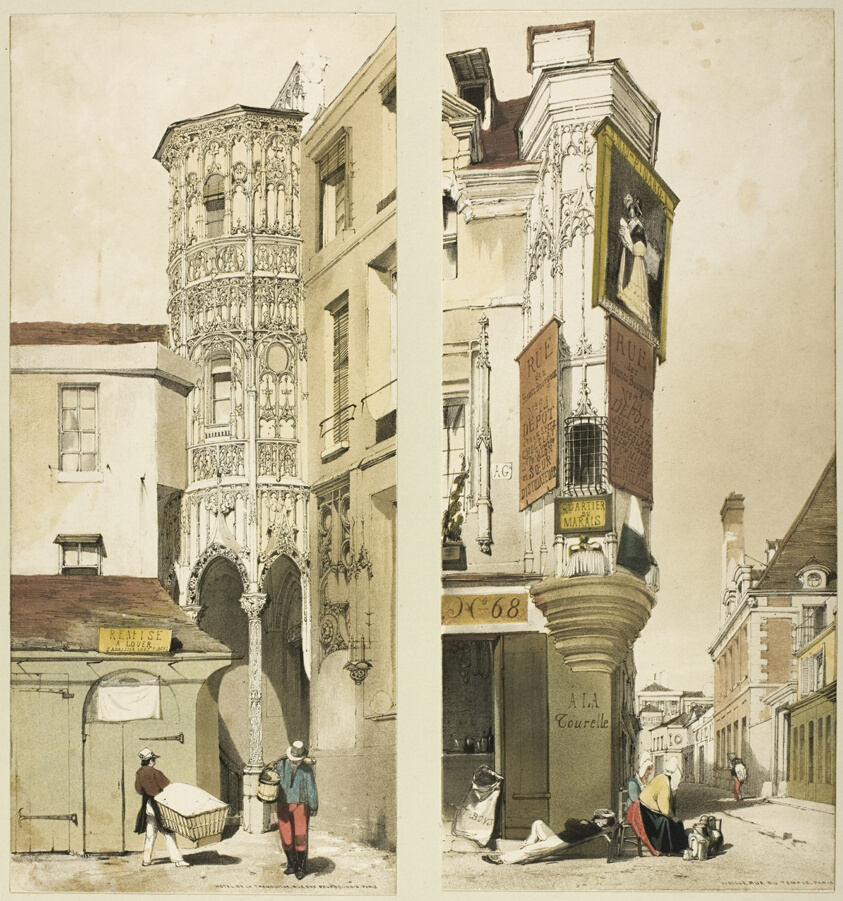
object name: Print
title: Hotel de la Tremouille, Paris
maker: Thomas Shotter Boys (English, 1803-1874); published by Charles Joseph Hullmandel (English, 1789-1850)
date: 1839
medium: Color lithograph on paper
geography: England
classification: lithograph; print; prints and drawing